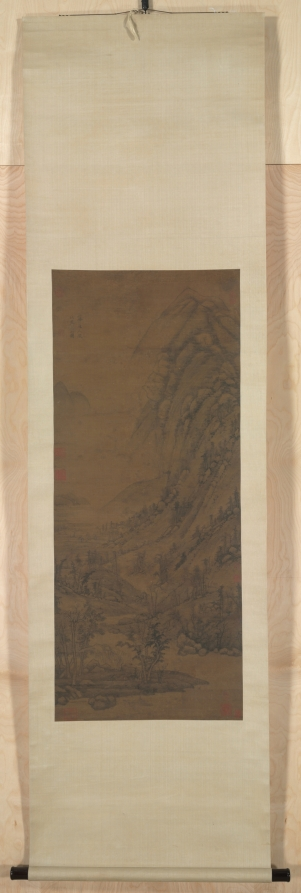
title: Summer Mountains (after Dong Yuan [active c. 937–75])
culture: China, Yuan dynasty (1271-1368)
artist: attributed to Huang Gongwang (Chinese, 1269–1354)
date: 1290–1354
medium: hanging scroll; ink and slight color on silk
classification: Painting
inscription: 【印】一峰道人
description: This monumental landscape is drawn in softly rounded strokes with darker lines frequently applied on top of lighter ones. This technique recalls one of the suggestions included in a collection of the artist's writings known as Secrets of Landscape Painting: The most difficult thing in painting is using the ink. The artist begins by using dilute ink and builds it up to the point where it begins to look right, then uses dense, black ink, applied fairly dry, and washes of deeper-toned ink. This technique distinguishes the fields from the paths, the far from the near. Huang Gongwang may have learned this technique from observing nature through the eyes of an earlier master, Dong Yuan, a painter whose style he shared.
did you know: The wet hills and moist, rich atmosphere evoke the southern Chinese summer, characterized by monsoon rains and lush growth.